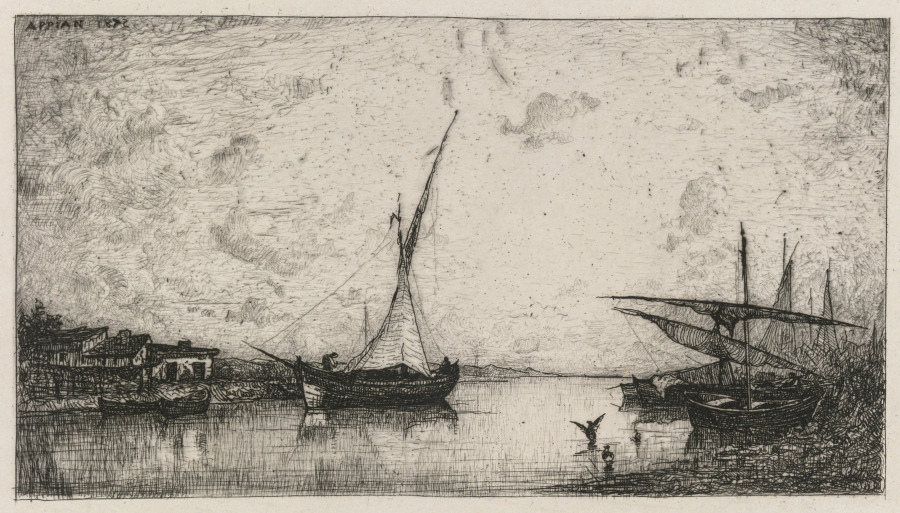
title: Canal aux Martigues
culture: France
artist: Adolphe Appian (French, 1818–1898)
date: 1872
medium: etching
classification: Print